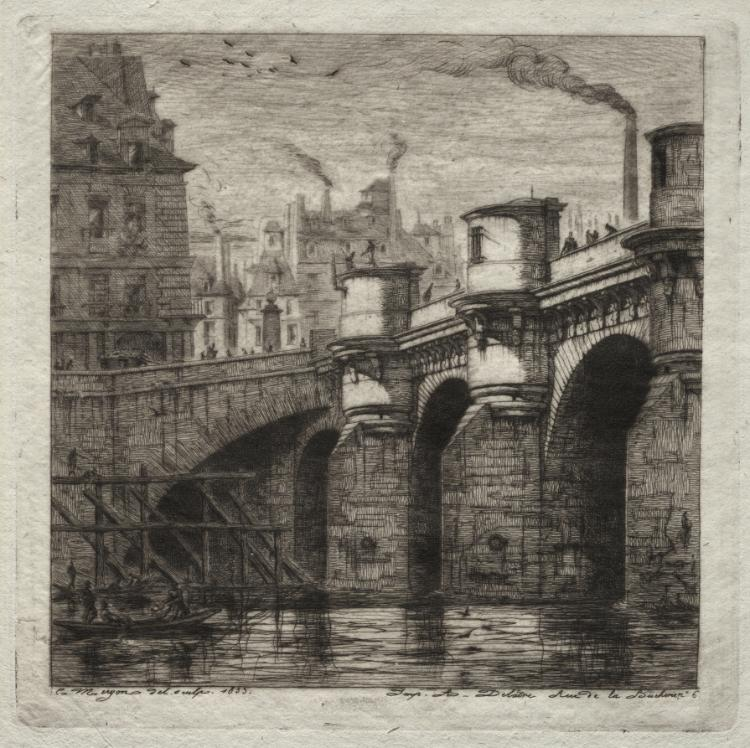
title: Etchings of Paris: The New Bridge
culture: France, 19th century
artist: Charles Meryon (French, 1821–1868)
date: 1853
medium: etching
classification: Print